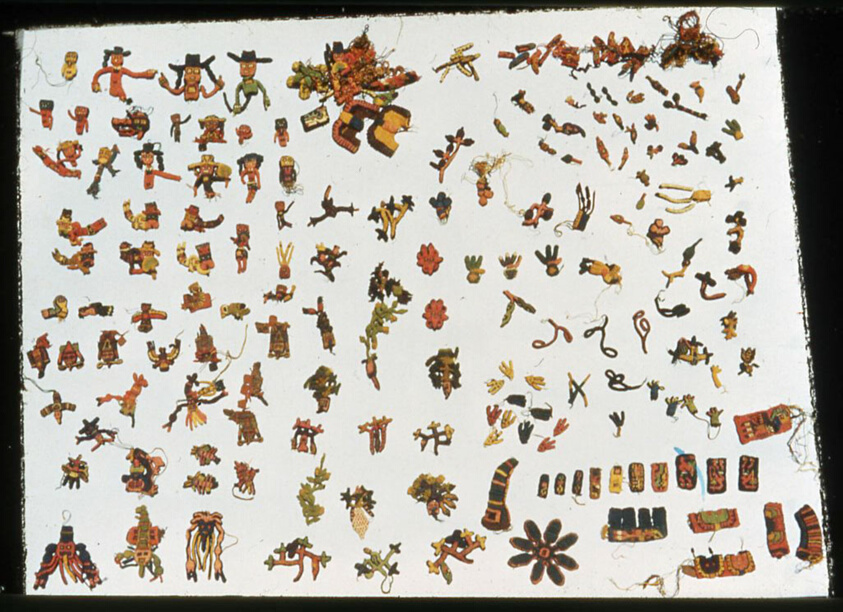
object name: Textile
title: Fragments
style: nazca, andean, andes, Pre-Columbian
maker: Nazca; Peru, south coast, Nazca Valley, Coyungo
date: 100 B.C./A.D. 200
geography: Peru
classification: textile; needlework (visual works)